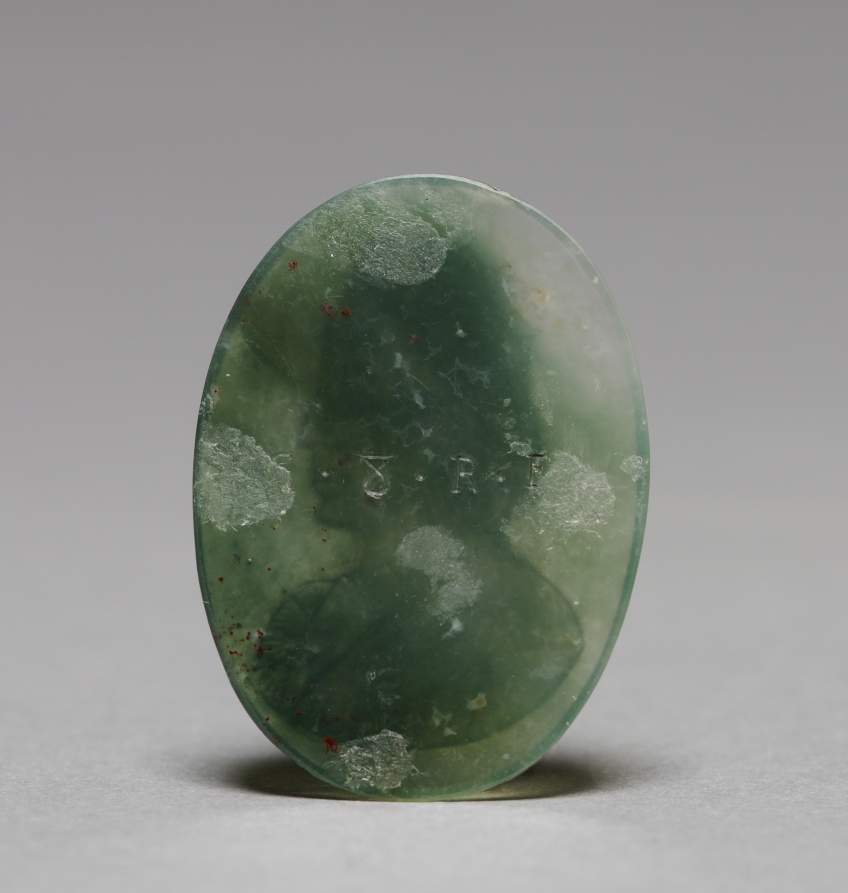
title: Cameo of King Charles VIII of France (1470–1498)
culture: France, Lyon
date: c. 1494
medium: agate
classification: Glyptic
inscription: "C 8 RF" (possibly a later inscription).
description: This jade-green agate cameo represents King Charles VIII in bust profile wearing the royal crown and the collar of the Order of St. Michael. The cameo was probably inspired by a gold medal presented to Charles by the City of Lyon during a visit in 1494 and was probably made to commemorate the event. It was perhaps a memento belonging to one of the town's nobles.